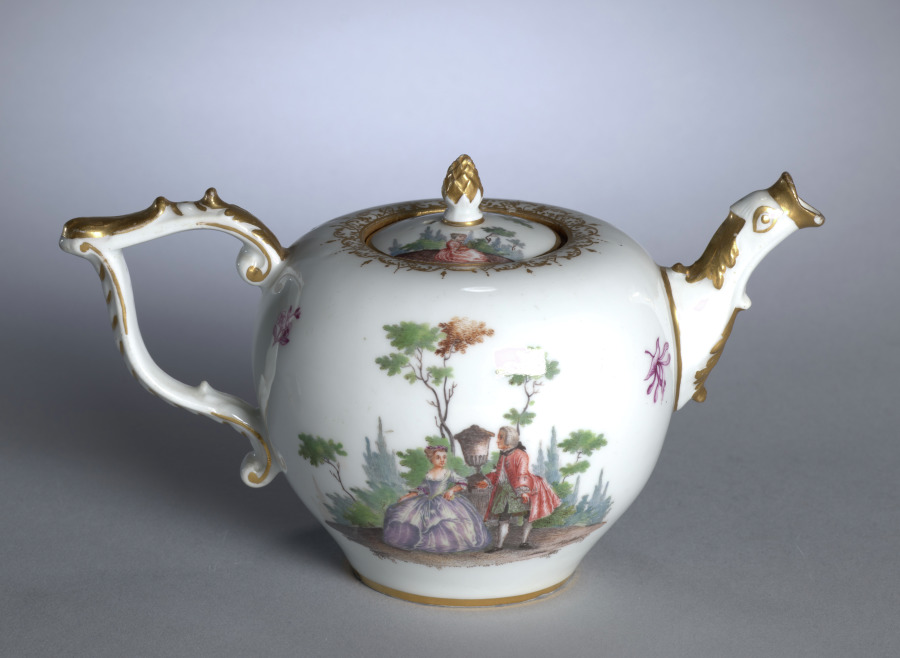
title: Teapot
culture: Germany, Meissen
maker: Meissen Porcelain Factory (German, est. c. 1710)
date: c. 1750–70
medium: porcelain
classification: Ceramic